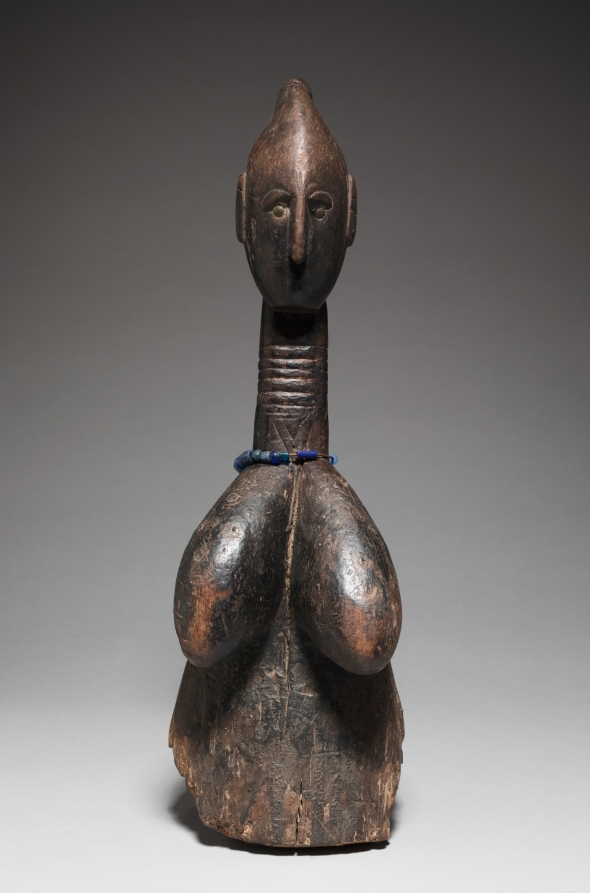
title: Headdress (Zigiren-Wɔndɛ)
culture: Africa, West Africa, Guinea, Baga-style carver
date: early to mid-1900s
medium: Wood, glass beads, upholstery studs, and natural fiber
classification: Mask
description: Owned and used for entertainment by young unmarried men only among some Baga subgroups, this type of headdress is said to represent the Maiden, a beautiful young woman. With a beaded necklace and eyes embellished with furniture tacks, the headdress was attached to a cone-shaped costume consisting of colorful cloths and raffia and constructed over a bamboo armature.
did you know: The performer of this mask grasped the projecting "legs" to steady it while balancing it on his head.